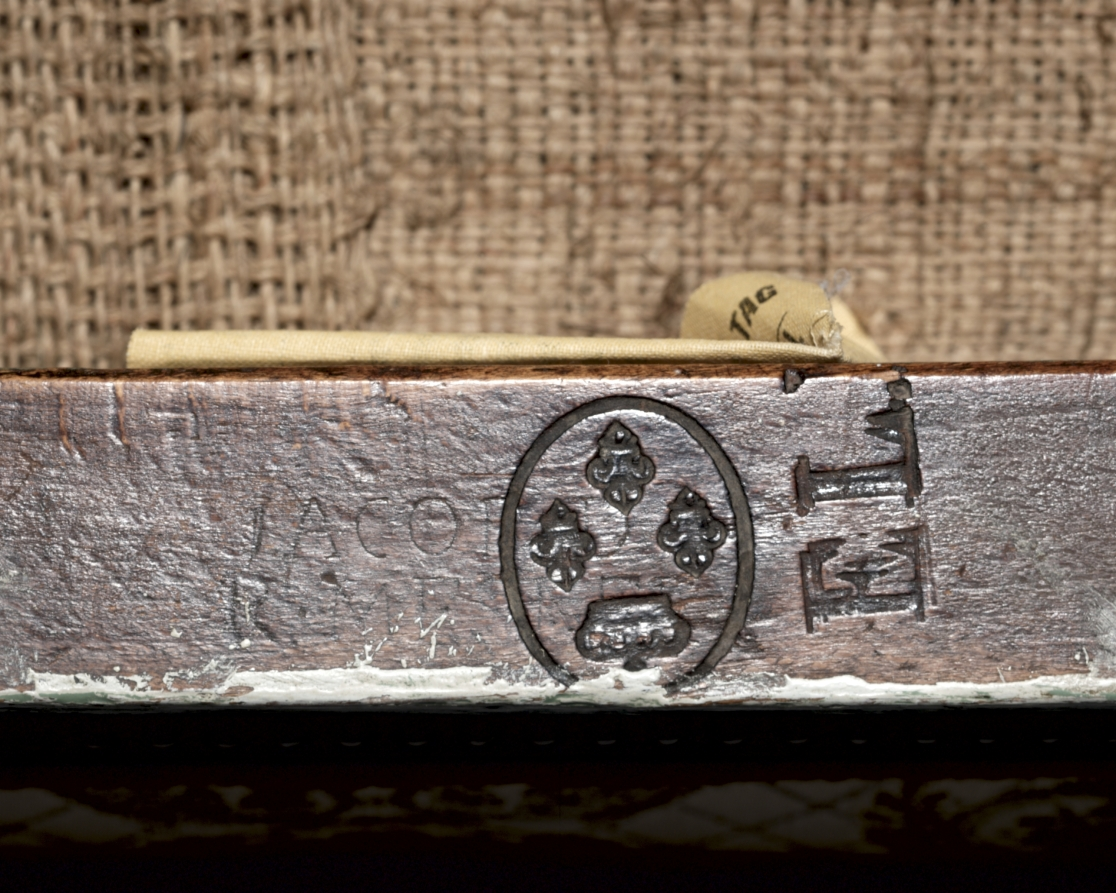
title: Stool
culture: France, Paris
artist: François-Honoré-Georges Jacob (French, 1770–1841)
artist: Georges Jacob (French, 1739–1814)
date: 1805–1813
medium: painted walnut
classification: Furniture and woodwork